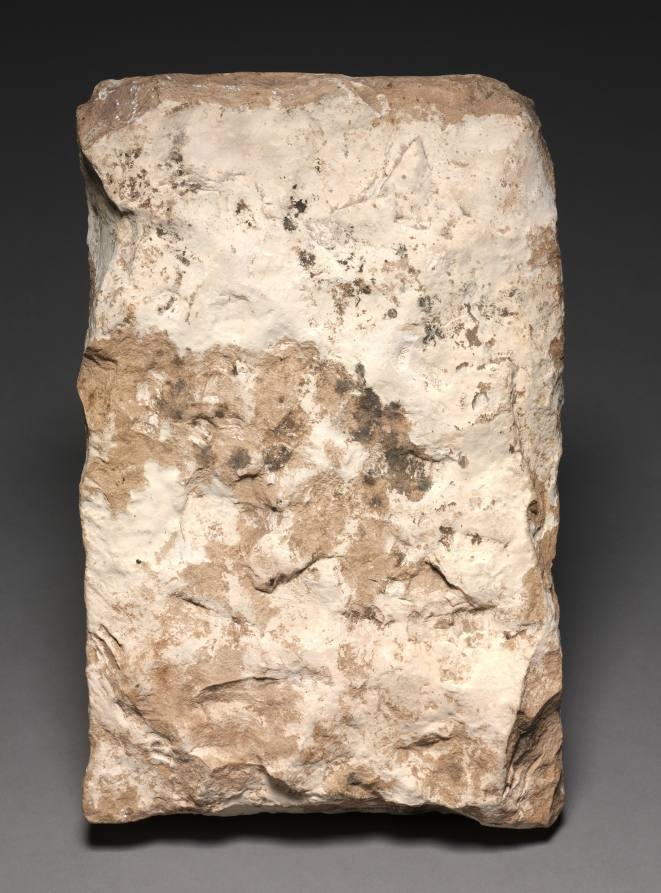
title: Domestic Shrine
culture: Egypt, Thebes(?), New Kingdom (1540–1069 BCE), Dynasty 18, reign of Tuthmosis III (1479–1425 BCE)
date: c. 1479–1425 BCE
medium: limestone, originally painted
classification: Sculpture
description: Used in the home like an icon, this shrine was originally provided with two wooden doors, hinged at each side and bolted in the center. The upper and lower sockets for the pivots of these doors still survive. The worshiper opened the doors to reveal the representation of King Tuthmosis III seated in front of an offering table. The hieroglyphic inscription at the base tells us that the shrine was made for the tomb worker Amenemheb. The carving is clearly in the style of Tuthmosis III’s reign, showing that such objects of private veneration were produced during the king‘s lifetime.